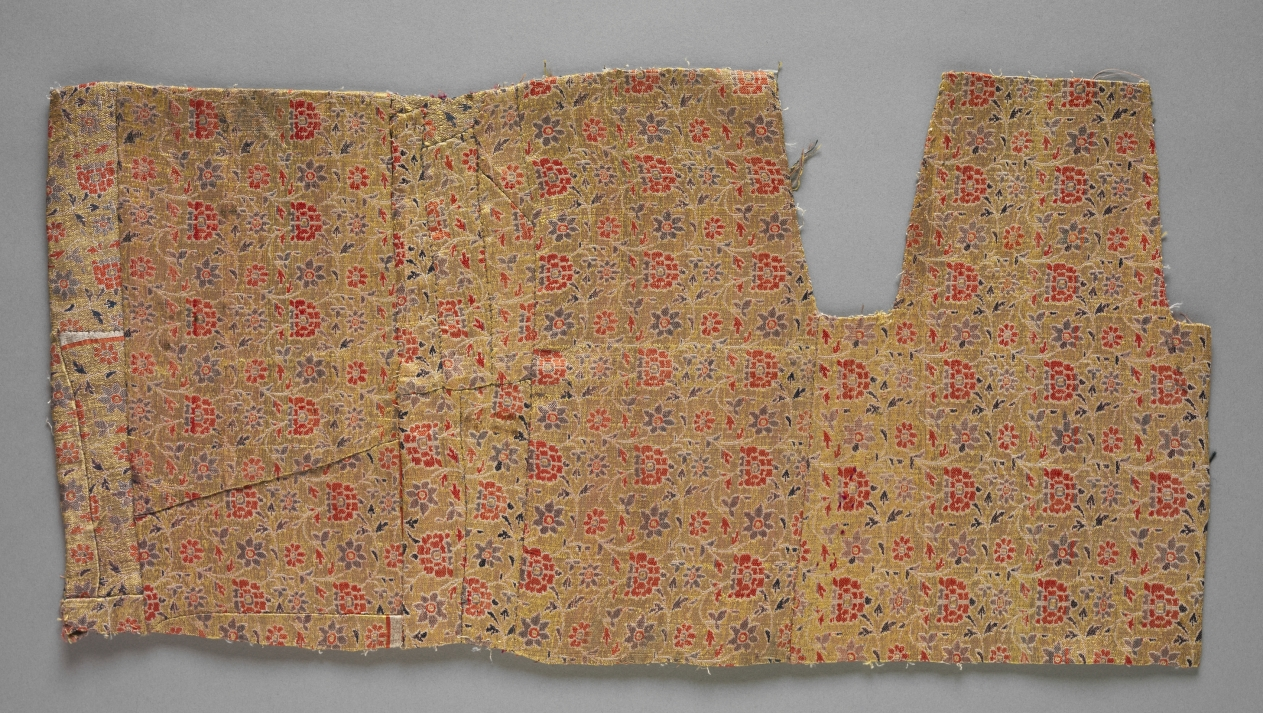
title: Fragments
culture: Iran, 18th century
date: 1700s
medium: silk, brocaded, with metal thread weft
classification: Textile